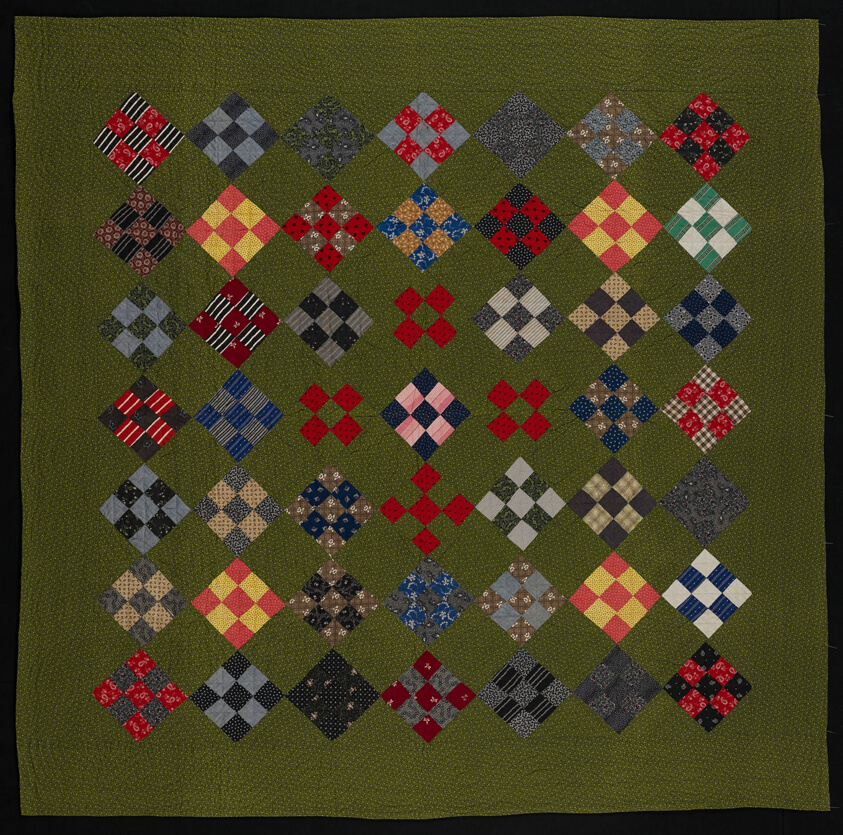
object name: Textile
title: Bedcover ("Nine Patch" Quilt)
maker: United States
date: late 19th century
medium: Cotton, plain weaves; printed; pieced; quilted; backed with cotton, plain weave; printed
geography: United States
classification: needlework - quilt; textile